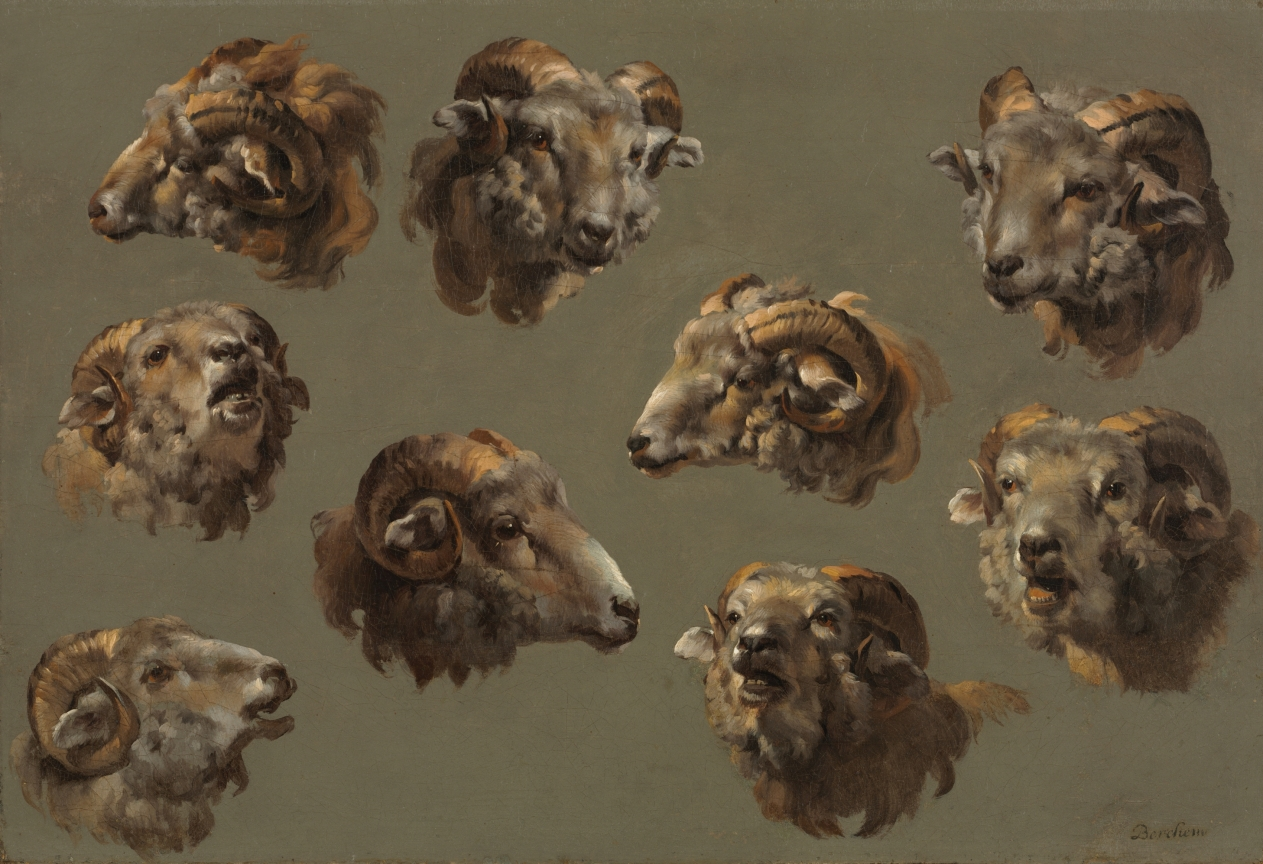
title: Studies of Ram Heads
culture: France, 18th century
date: 1700s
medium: oil on canvas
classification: Painting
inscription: signed lower right: Berchem.